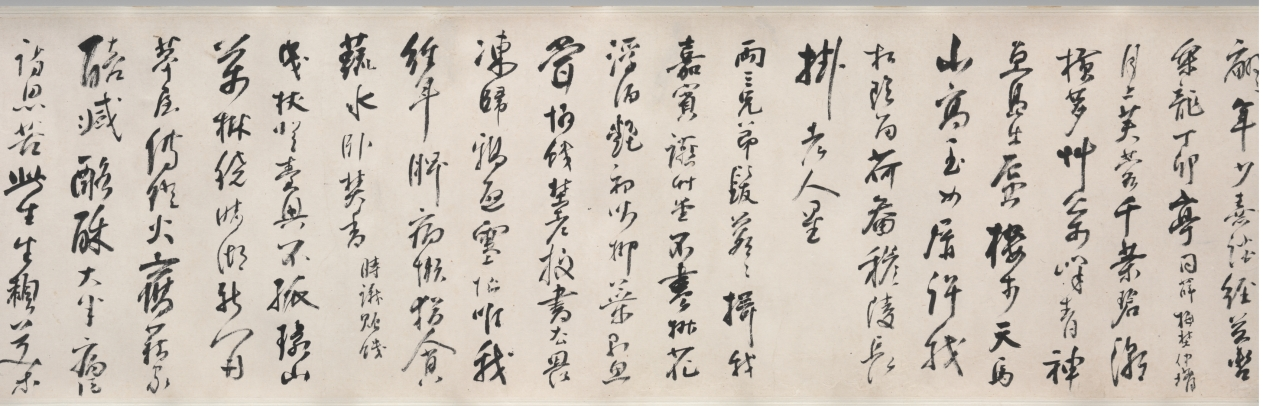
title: Snow Coloring the World White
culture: China, Qing dynasty (1644-1911)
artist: Fa Ruozhen (Chinese, 1613–1696)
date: 1690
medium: handscroll, ink on paper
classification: Painting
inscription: Artist's title on frontispiece, colophon with 6 poems, and 7 seals: [seal] Ch'ien-k'un i ts'ao t'ing. Snow Coloring the World White. Huang-shan lao-jen, Jo-chen, at the age of seventy eight. [2 seals] Fa yin Jo-chen; Huang-shih shih. (Artist's poems are not translated.) In the first month of the keng-wu year [1690], 1 was seventy-eight years old. On a snowy day I was pleased to have my good son-in-law Ch'eng-ssu and other gentlemen visiting me at my Tz'u-ching Hall at Yellow Hill. I did this snowscape to record the event. [2 seals] Fa Jo-chen; Tun Chai. [2 seals at end of painting] Fa yin Jo-chen; Huang-shih shih. trans. LYSL/WKH 12 additional seals: 8 of Ho Kuan-wu (20th c.); 1 of Wang Nan-p'ing (20th c.); 3 unidentified.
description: Fa Ruozhen was a scholar-official and prolific poet who focused on painting as his government career declined. The inscription records that he was 78 years old when he painted this handscroll to welcome visitors on a snowy day. At this point in his artistic development, Fa created expressive landscapes and experimented with unconventional brushwork. This handscroll begins at the right with gentle hills dotted with evergreens and bare deciduous trees. By the end, the twisting rocky forms dominate. Fa’s official career spanned the fall of the Han Chinese Ming dynasty (1368–1644) and the rise of the Manchurian Qing dynasty (1644–1911). While other scholar-officials who declined to serve the Manchus had their reputations enhanced, critics accused Fa of disloyalty for serving in the new bureaucracy. Fa was deeply sensitive about this criticism. In many of his 4,000 known poems, he responded by emphasizing the Confucian virtue of being a good administrator particularly during an unstable time. Fa’s “disorderly” brushwork and distressed landscapes seem to reflect the political upheaval of his era.